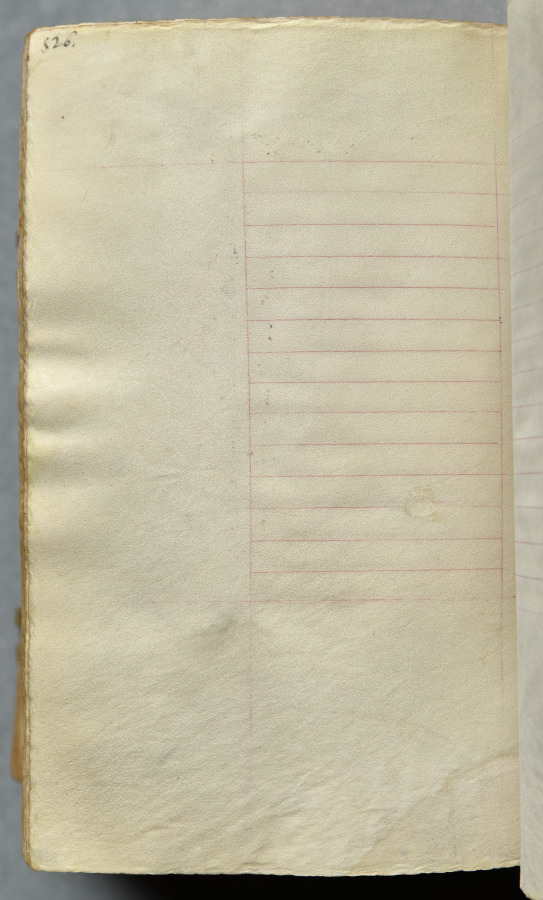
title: Hours of Charles the Noble, King of Navarre (1361-1425): fol. 257v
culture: France, Paris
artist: Master of the Brussels Initials and Associates (French)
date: c. 1405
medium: ink, tempera, and gold on vellum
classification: Bound Volume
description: This precious volume was obviously highly prized by its owner, the French-born King of Navarre, who had his coat of arms painted on no less than twenty folios. Rather than directly commissioning this manuscript from a specific workshop, it seems that Charles the Noble acquired his book of hours -- perhaps ready-made for the luxury market -- while on a trip to Paris in 1404-05. A collaborative effort, six painting styles are evidenced within the pages of this codex, those of two Italians, two Frenchmen, and two Netherlanders. The painter who was responsible for the planning and decoration of the book, and who produced seventeen of the large miniatures, was a Bolognese artist known as the Master of the Brussels Initials. His principal assistant, responsible for most of the borders, was a Florentine who signed his name "Zecho" da Firenze on folio 208 verso.